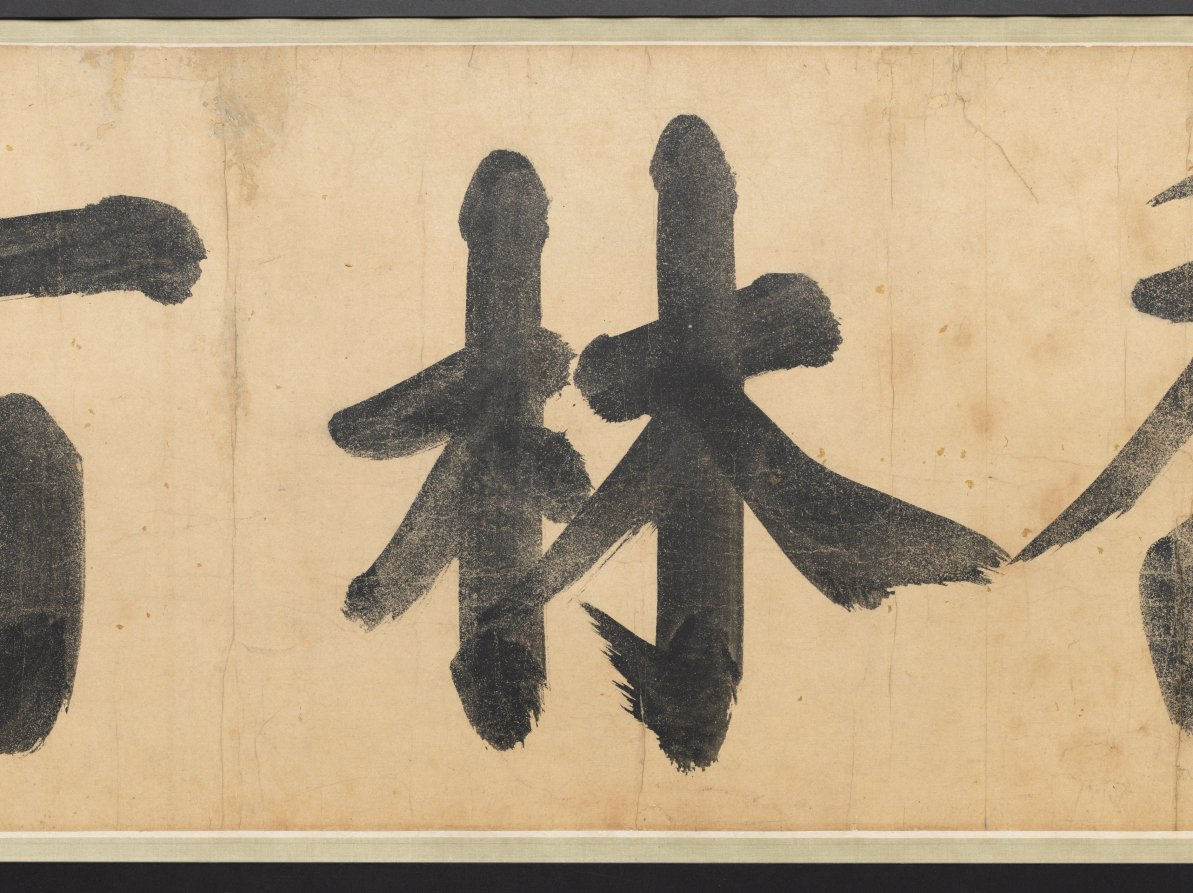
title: A Hundred Sparrows in a Lofty Grove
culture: China, Ming dynasty (1368–1644)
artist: attributed to Lin Liang (Chinese, 1416–1480)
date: 1368–1644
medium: handscroll; ink on silk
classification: Painting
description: Sparrows engaged in all kinds of activities frolic amid leafy branches, blades of grass, rocks, and a waterfall. As our eyes move over the scroll, the artist engages us in enjoying the sparrows’ carefree movements in a natural setting. The charming birds were painted from close observation in swift and fluent brushstrokes. Sparrows are a common bird and in Chinese painting they often represent the commoner in human society as opposed to the noble pheasant or peacock representative of the ruling class.